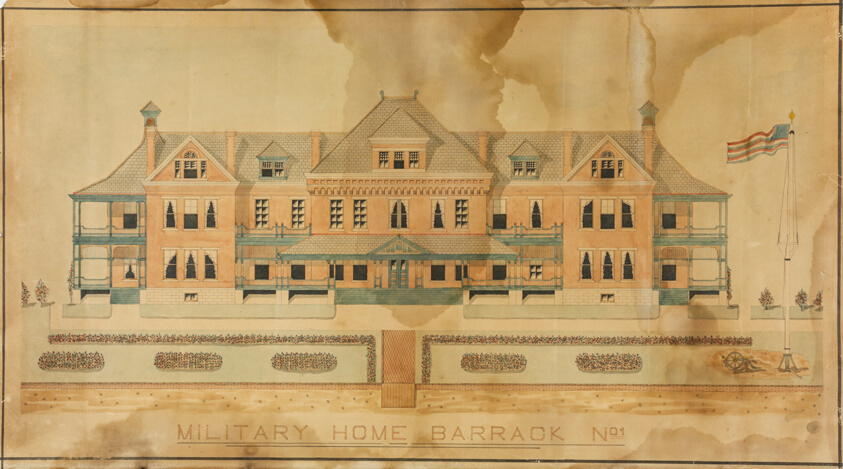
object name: Architectural Drawing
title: Military Home Barrack No. 1, Presentation Drawing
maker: Unknown Artist; 19th Cent.; Unknown English artist; Unknown American artist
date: c. 1880s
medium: Ink and colored ink on paper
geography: United States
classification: presentation drawing; architectural drawing; architecture